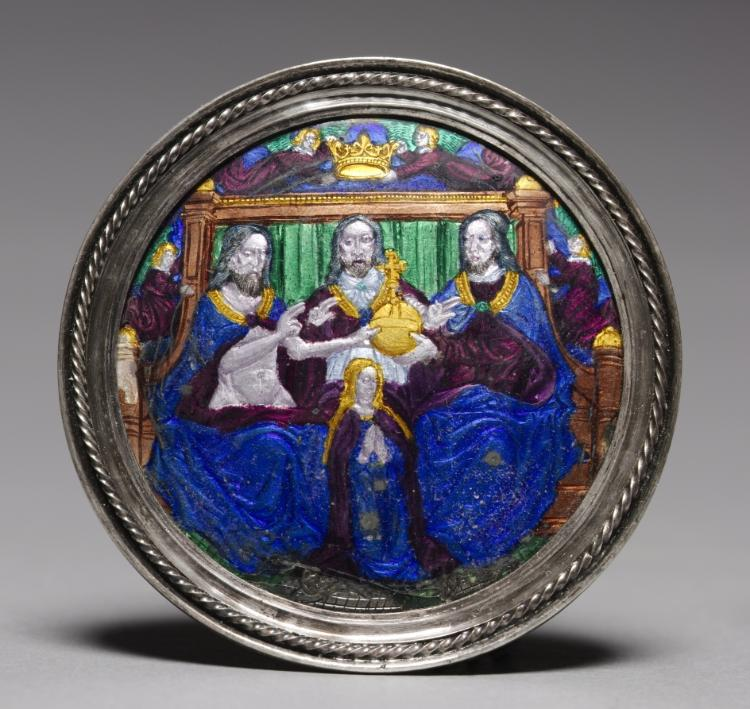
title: Medallion: Coronation of the Virgin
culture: France, 15th century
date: late 1400s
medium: basse-taille enamel on silver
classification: Enamel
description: The word enamel derives from the Old French esmail and the Old High German smelzen, meaning "to smelt." This is the most crucial process in the making of enamel. To prepare enamel, the constituents of glass (flint, or sand, as well as red lead, and soda or potash) are heated together to form a clear flux. To this a coloring agent (usually a metallic oxide) is added: copper for green, cobalt for blue, iron for red or brown. The enamel is then allowed to cool and solidify in slabs. Before use, each color is separately ground into a fine powder, placed on a prepared metal surface, and fired in a kiln. When cool, the surface is polished to remove any imperfections and add brilliance to the colors. The difference between the various enameling techniques lies chiefly in the methods used to prepare the metal surface for the enamel.